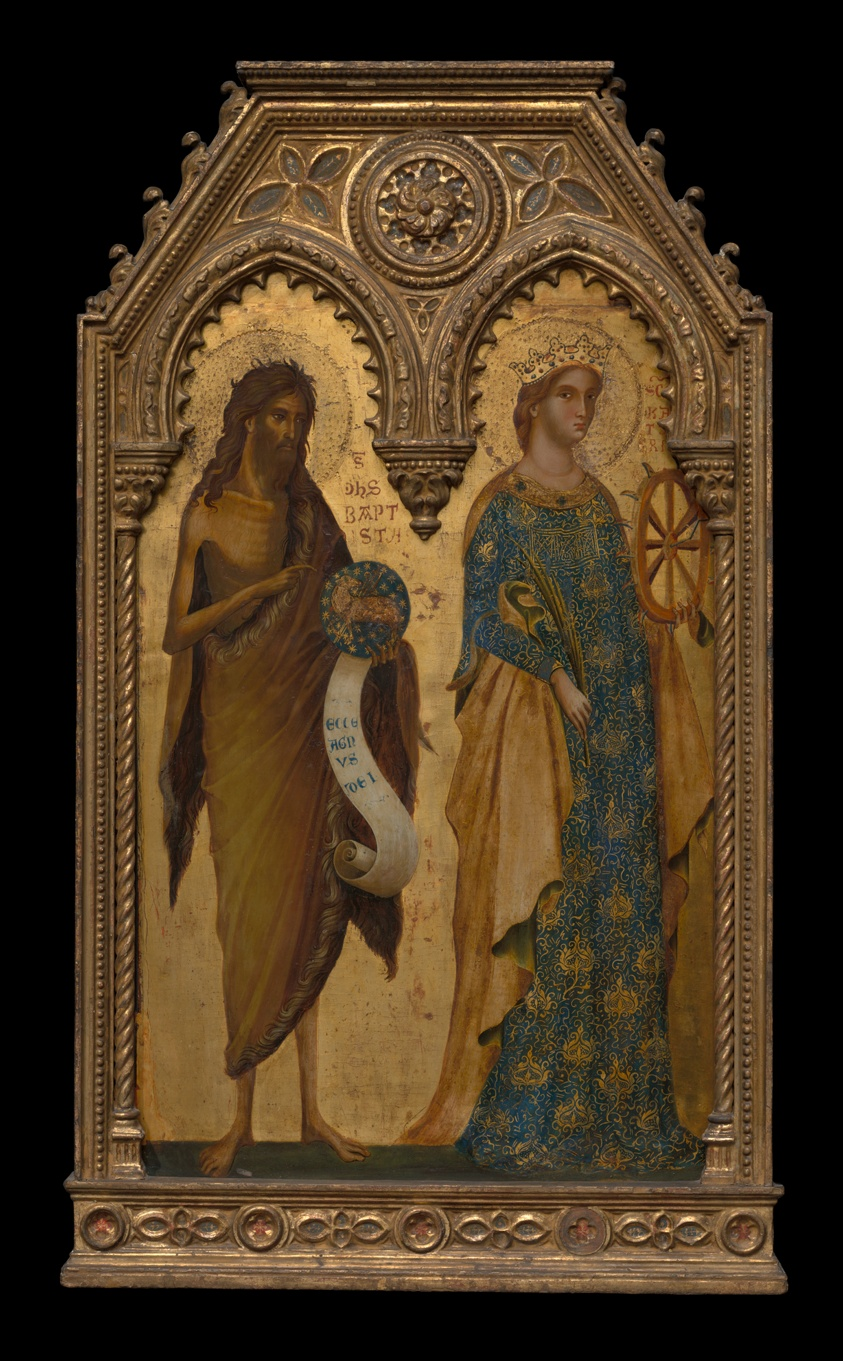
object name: Painting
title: Saints John the Baptist and Catherine of Alexandria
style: 14th century, medieval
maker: Paolo Veneziano (Italian, active 1333–1358/62); Workshop of Paolo Veneziano (Italian, active 1333–1358/62)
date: c. 1350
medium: Tempera on panel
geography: Venice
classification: tempera; paint; Italian; painting; european painting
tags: Century of Progress, woman, wheel, sheep, saints, Saint John the Baptist, Saint Catherine, religious figures, religious, religion, man, gold (color), Devotion, crowns, Christianity, Christian subjects, blue (color), blue, animals, world's fairs, Chicago World's Fairs